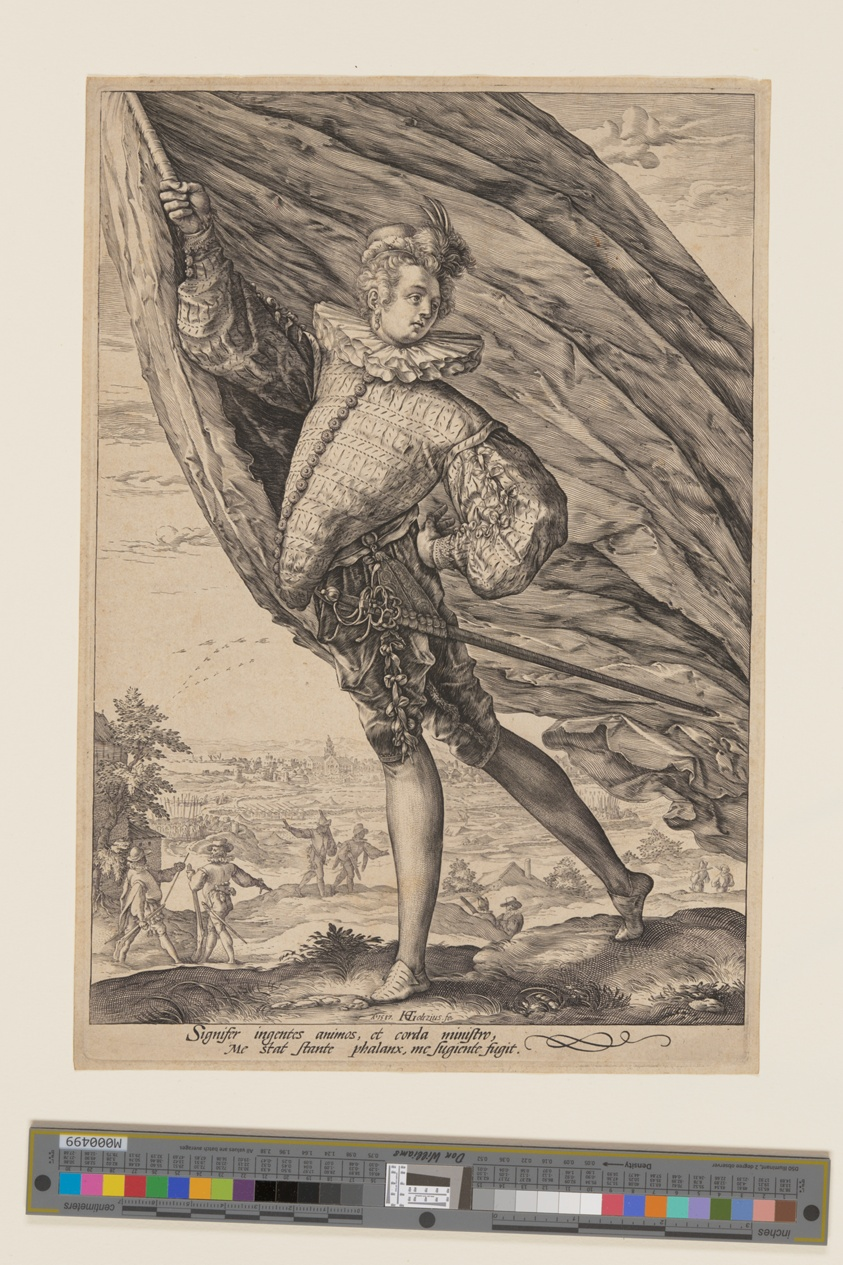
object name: Print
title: The Standard Bearer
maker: Hendrick Goltzius (Dutch, 1558–1617)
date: 1587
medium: Engraving on ivory laid paper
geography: Netherlands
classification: engraving; paper; print; prints and drawing